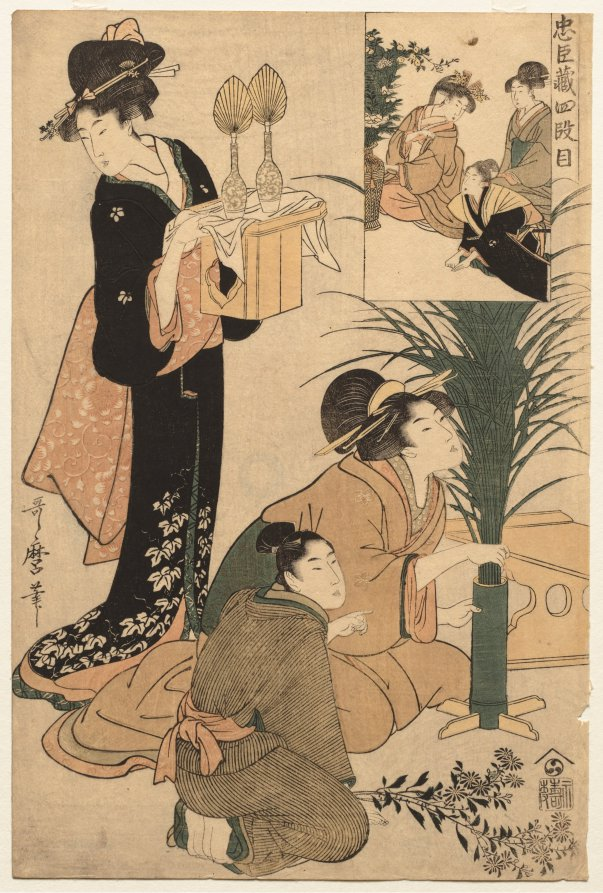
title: Chushingura: Act IV of The Storehouse of Loyalty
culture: Japan, Edo period (1615–1868)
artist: Kitagawa Utamaro (Japanese, c. 1754–1806)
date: late 1790s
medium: color woodblock print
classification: Print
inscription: Signature: Utamaro hitsu Publisher: Nishimuraya Yohachi (Eiju han, emblem)